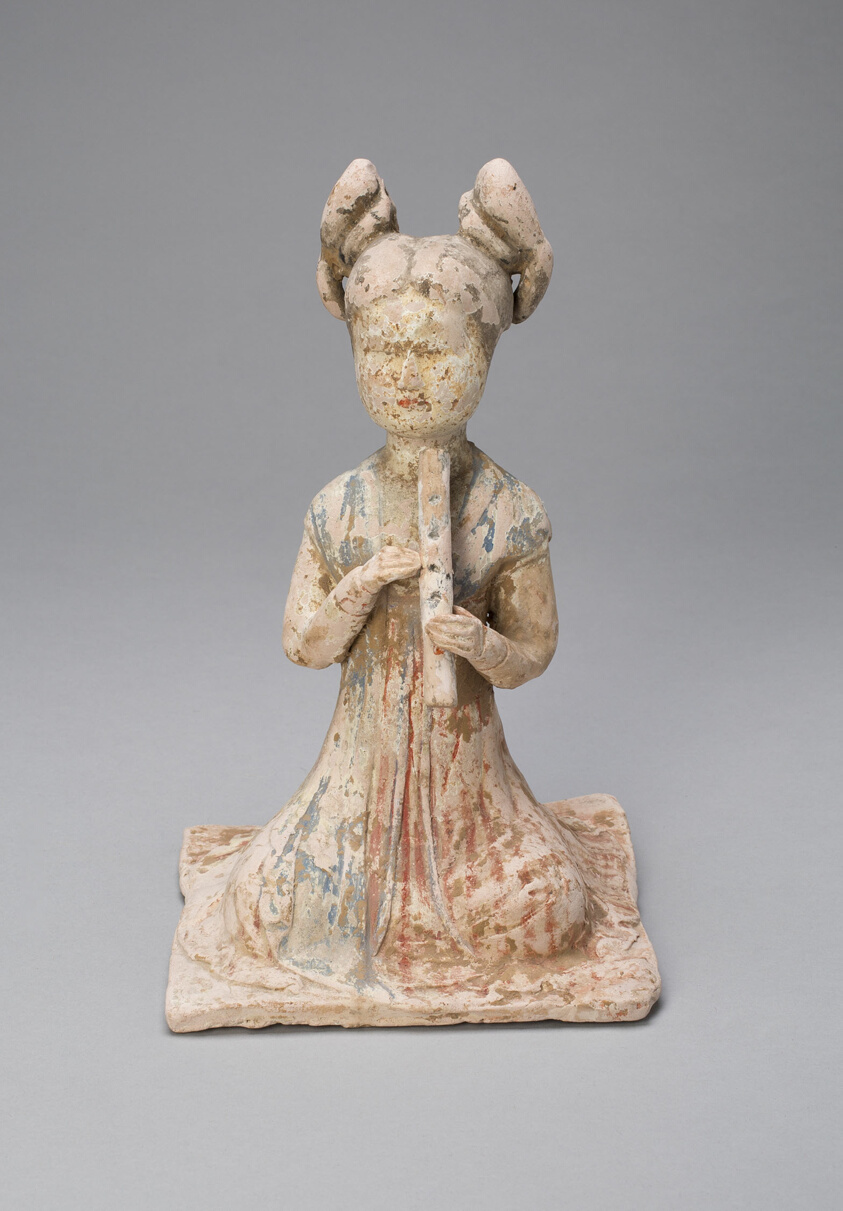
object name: Sculpture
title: Female Musician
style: Chinese (culture or style)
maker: China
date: Tang dynasty (618–907), late 7th or early 8th century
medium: Earthenware with polychrome pigments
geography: China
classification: statuette; sculpture